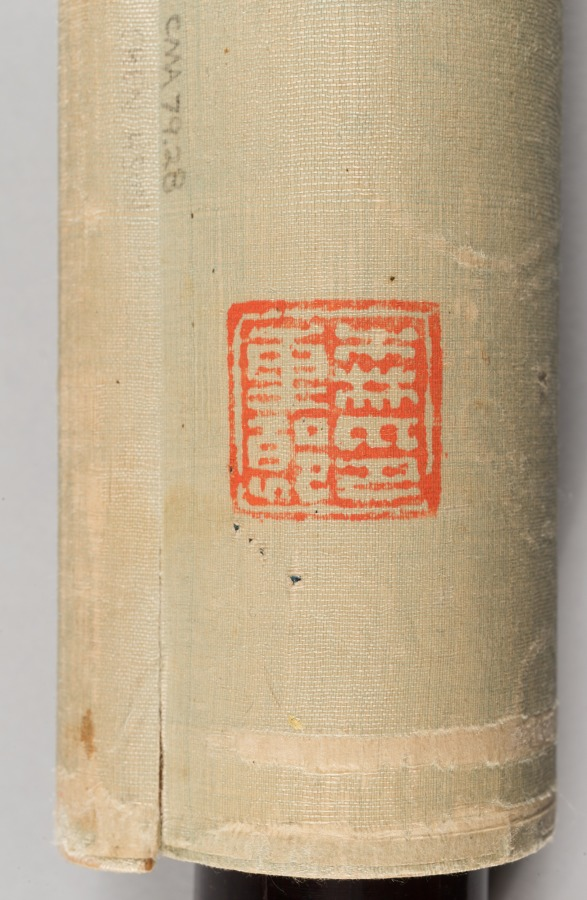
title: Looking for a Monastery in the Misty Mountains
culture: China, Ming dynasty (1368–1644)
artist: Chen Chun (Chinese, 1483–1544)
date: 1500–1544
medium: hanging scroll, ink on paper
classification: Painting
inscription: Artist's inscription, signature, and 2 seals: Row after row of misty trees envelop the Buddhist Monastery./ But the rustic who comes to find it will not lose his way./ Just across the wooden bridge, the dusty world is cut off;/ Among the countless falling petals, birds are singing confusedly. Daofu 道複 composed [this]. [seals] Fufu shi 復甫; Baiyang shanren 白陽山人. trans. WKH/LYSL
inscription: 3 additional unidentified seals.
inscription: 1 additional unidentified seal on the back of the mounting.